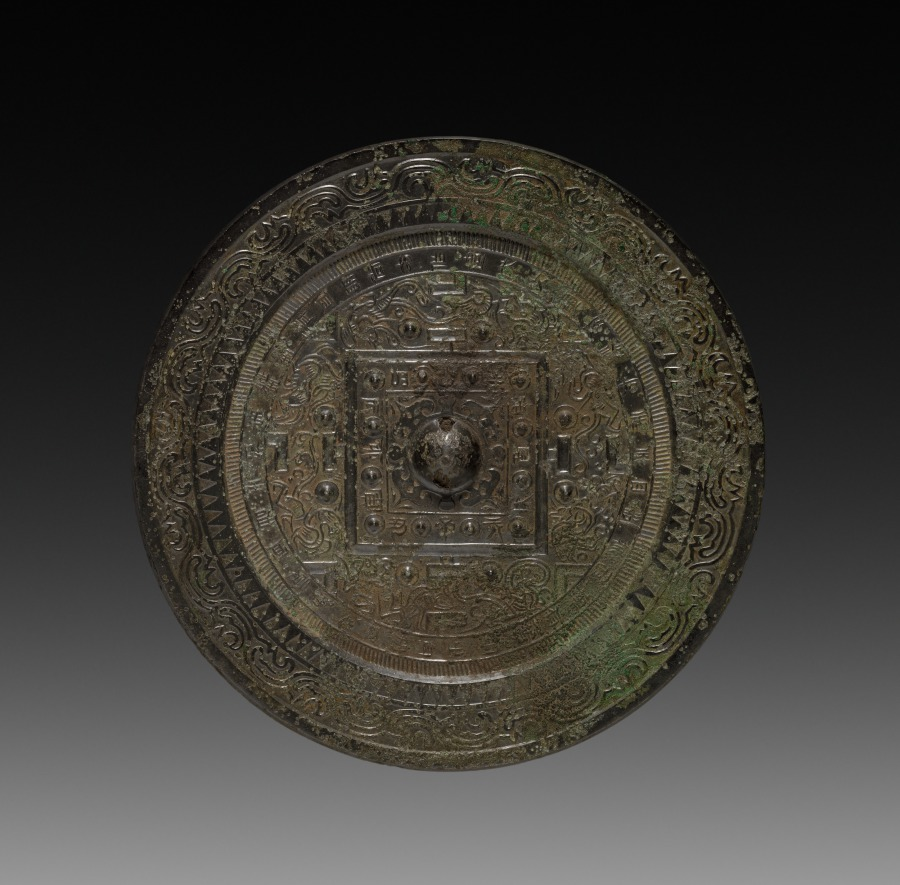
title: Mirror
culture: China, Eastern Han dynasty (25–220 CE)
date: 25–220 CE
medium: bronze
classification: Metalwork